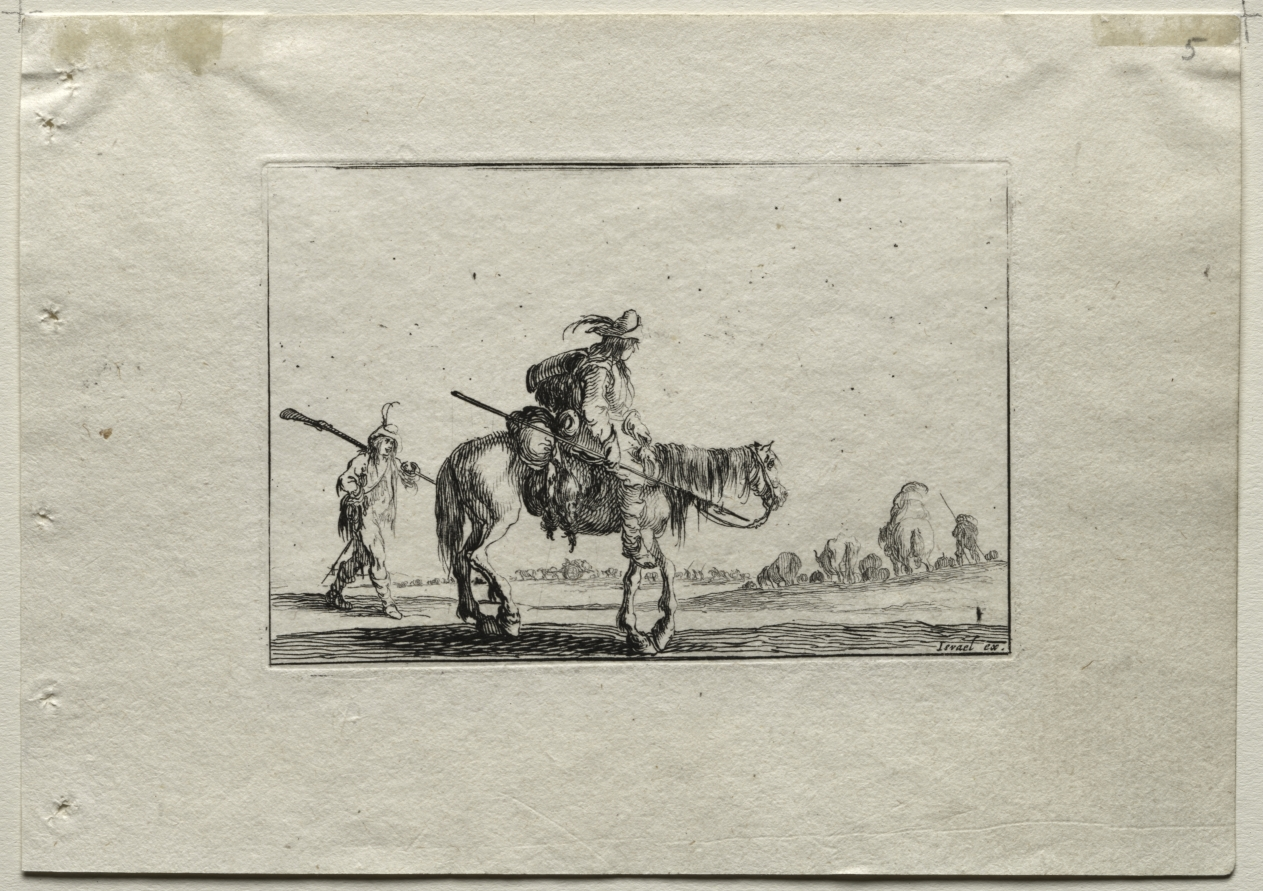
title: Caprices: Mounted Soldier and Foot Soldier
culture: Italy, 17th century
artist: Stefano Della Bella (Italian, 1610–1664)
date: c. 1642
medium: etching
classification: Print